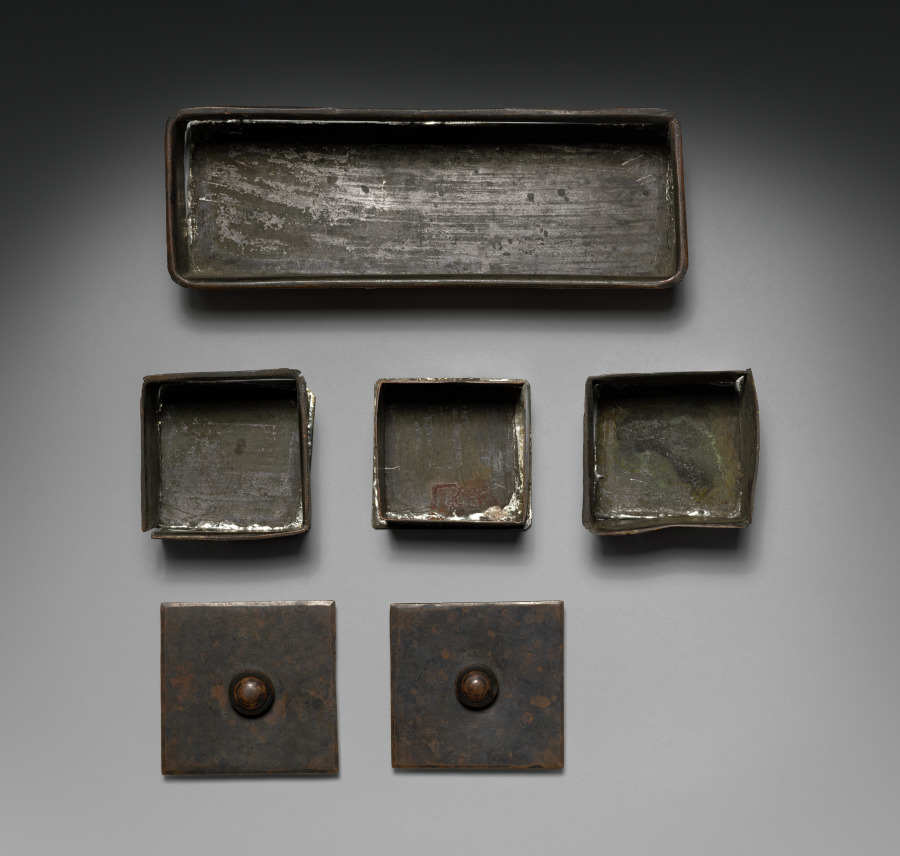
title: Writing Casket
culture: Italy, Ravenna, 16th century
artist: workshop of Severo da Ravenna (Italian, c.1496–c.1543)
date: c. 1525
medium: bronze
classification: Sculpture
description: The interior is divided into four compartments for storing writing implements and sand for blotting.